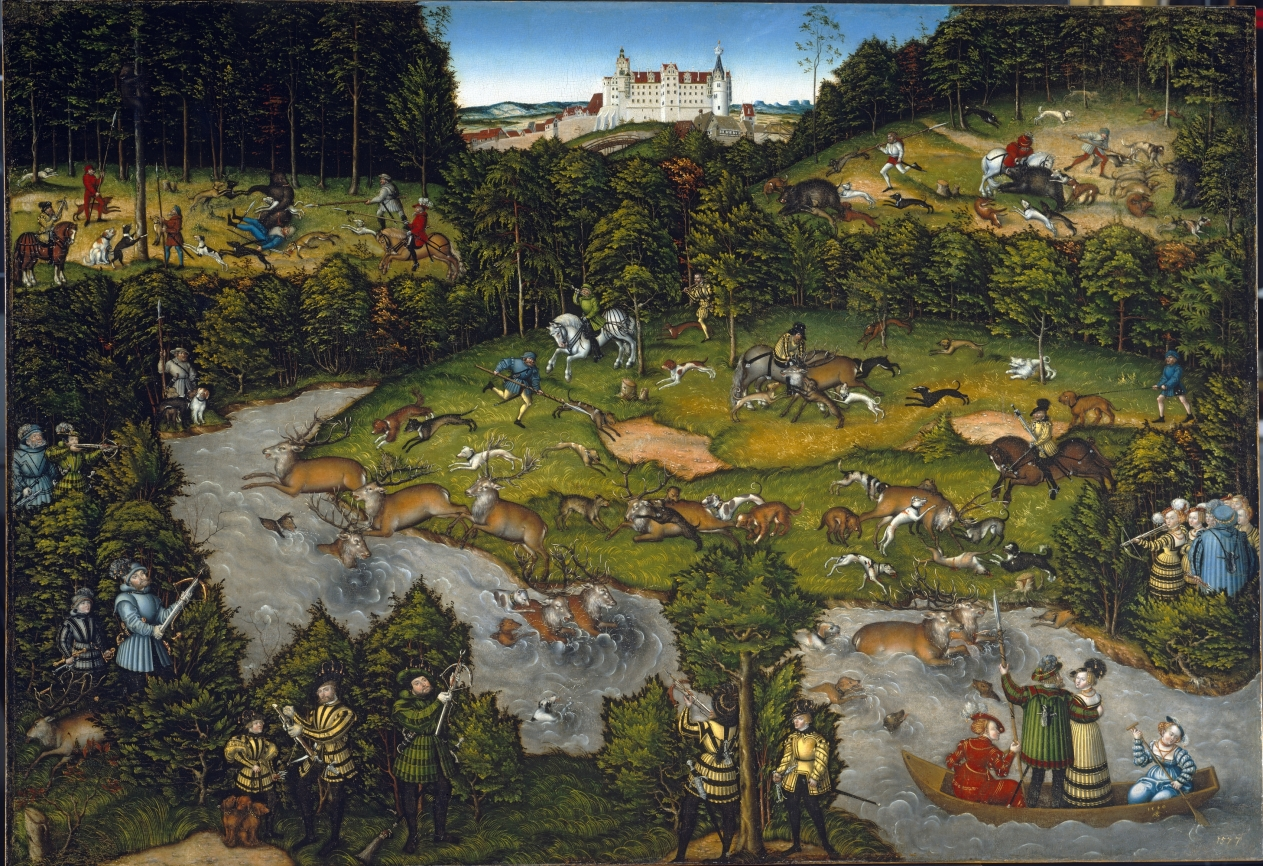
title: Hunting near Hartenfels Castle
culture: Germany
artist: Lucas Cranach (German, 1472–1553)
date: 1540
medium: oil, originally on wood, transferred to masonite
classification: Painting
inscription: Signed lower right on boat with a winged serpent, and dated: 1540 [inventory number, lower right: 1577]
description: The Protestant rulers of Saxony commissioned this animated hunt scene, set near their residence seen in the background, Hartenfels Castle (in eastern Germany). John Frederick the Magnanimous, in the bottom left corner, wears dark green hunting attire; he spans his crossbow and waits for his courtiers and dogs to chase a stag across the river. His wife, the Electress Sibylle, stands at right, poised to take the first ceremonial shot. The prince electors of Saxony were passionate practitioners of hunting with dogs—elaborate, highly rehearsed occasions, coordinated by the use of signals from hunting horns. Cranach dated this work and his signature is the winged snake at lower right. 1577 in the right corner is an inventory number.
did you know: Humans, dogs, and deer make up most of the creatures in this busy scene—but not all of them! Look closely at the background to spot a bear and three boars.